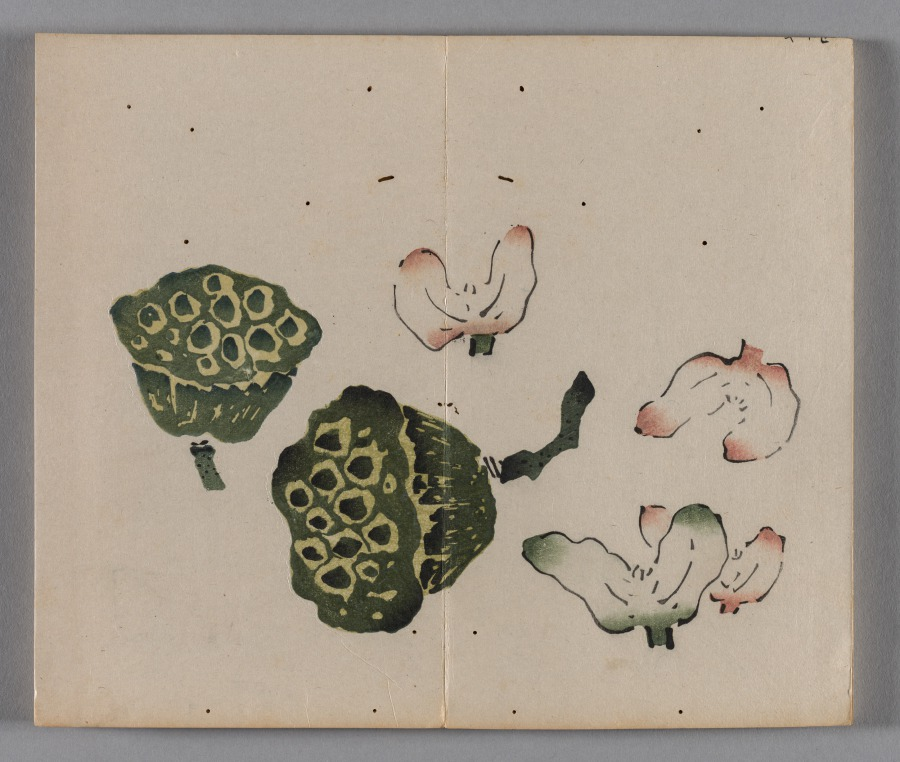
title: Ten Bamboo Studio Painting and Calligraphy Handbook (Shizhuzhai shuhua pu): Fruit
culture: China, Qing dynasty (1644-1911)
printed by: Hu Zhengyan (Chinese, c. 1584–1674)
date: 1633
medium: Woodblock-printed book; ink and colors on paper; first edition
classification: Print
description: Color printing reached a level of perfection in the early 1600s, as seen in this Ten Bamboo Studio Collection of Calligraphy and Painting and the Mustard Seed Garden Manual of Painting (printed 1679 and 1701). The painterly quality, precision in registering (aligning) the woodblocks, and harmonious colors made them the most successful color print editions in Chinese history. Both editions were printed and compiled in Nanjing, spread nationwide, and had a great impact on the arts in Japan and Korea.